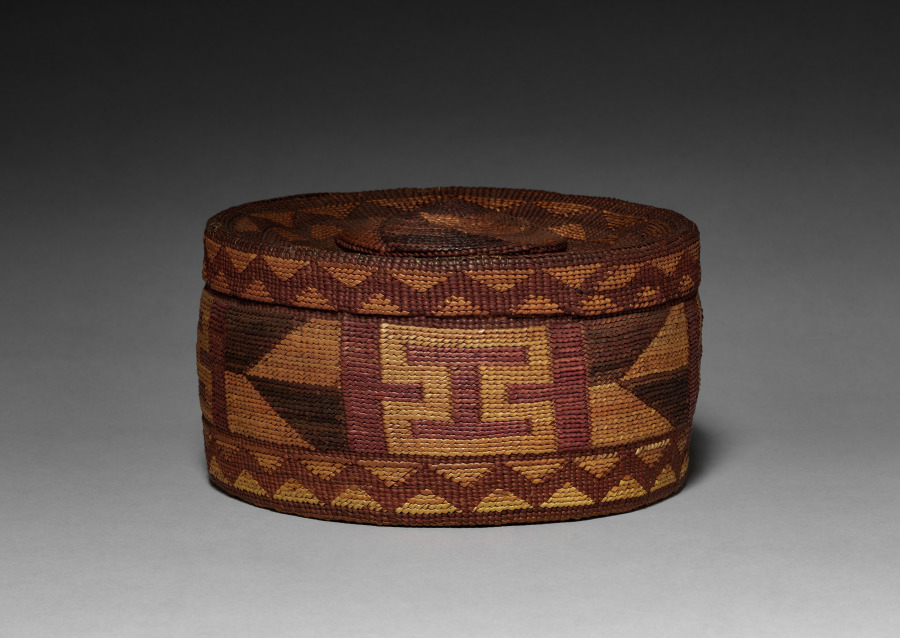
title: Basket with Rattle Top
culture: Northwest Coast, Tlingit, 20th century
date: before 1929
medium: twined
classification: Basketry